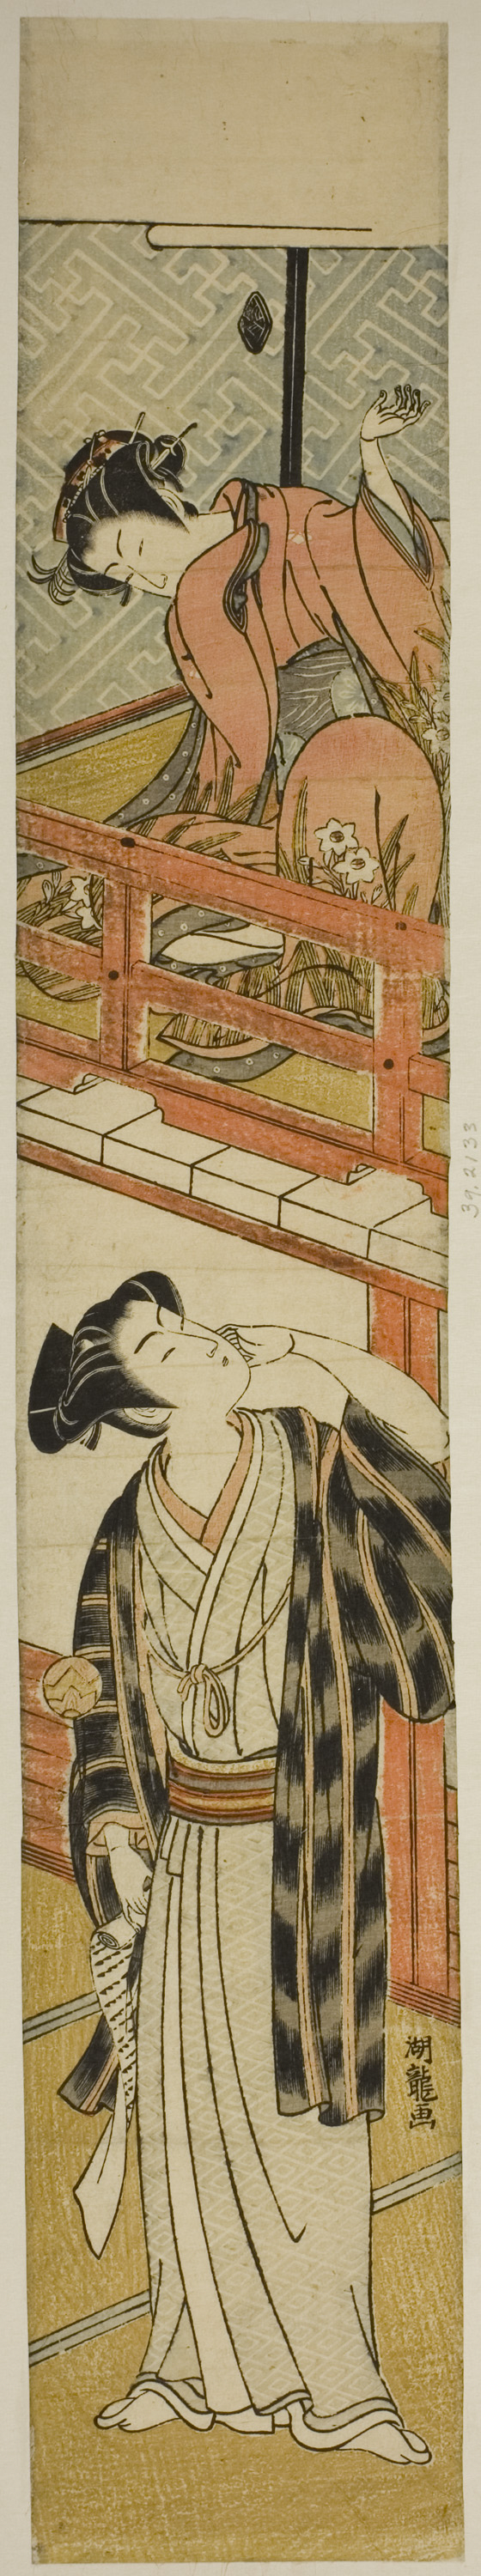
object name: Print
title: Young Woman Throwing a Ball at a Young Man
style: Japanese (culture or style)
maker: Isoda Koryusai (Japanese, 1735-1790)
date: c. 1774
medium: Color woodblock print; hashira-e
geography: Japan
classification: woodblock print; print; asian art